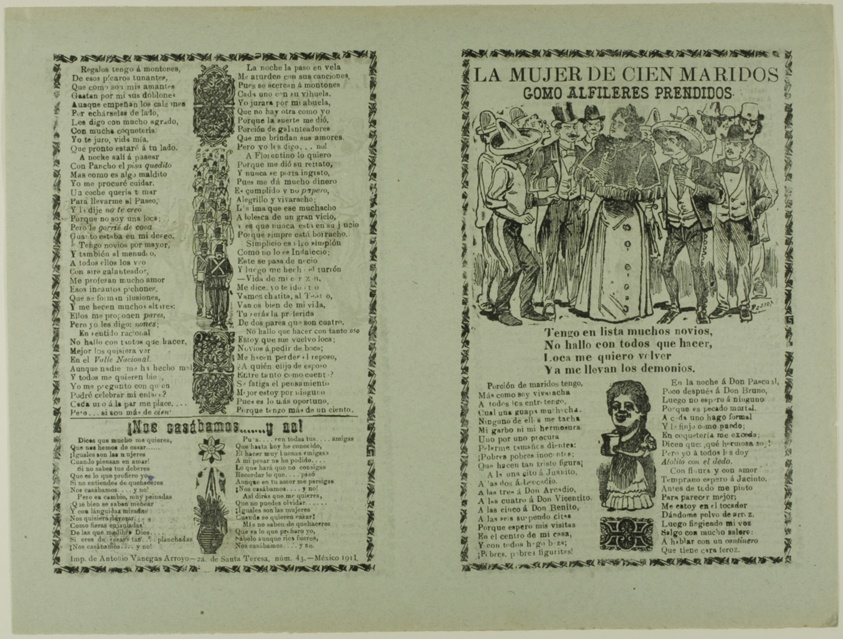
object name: Print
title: La mujer con cien maridos como alfileres prendidos (The women with hundreds of husbands like pins on fire)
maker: José Guadalupe Posada (Mexican, 1852-1913)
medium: Relief print on paper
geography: Mexico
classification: relief etching; print; prints and drawing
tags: text